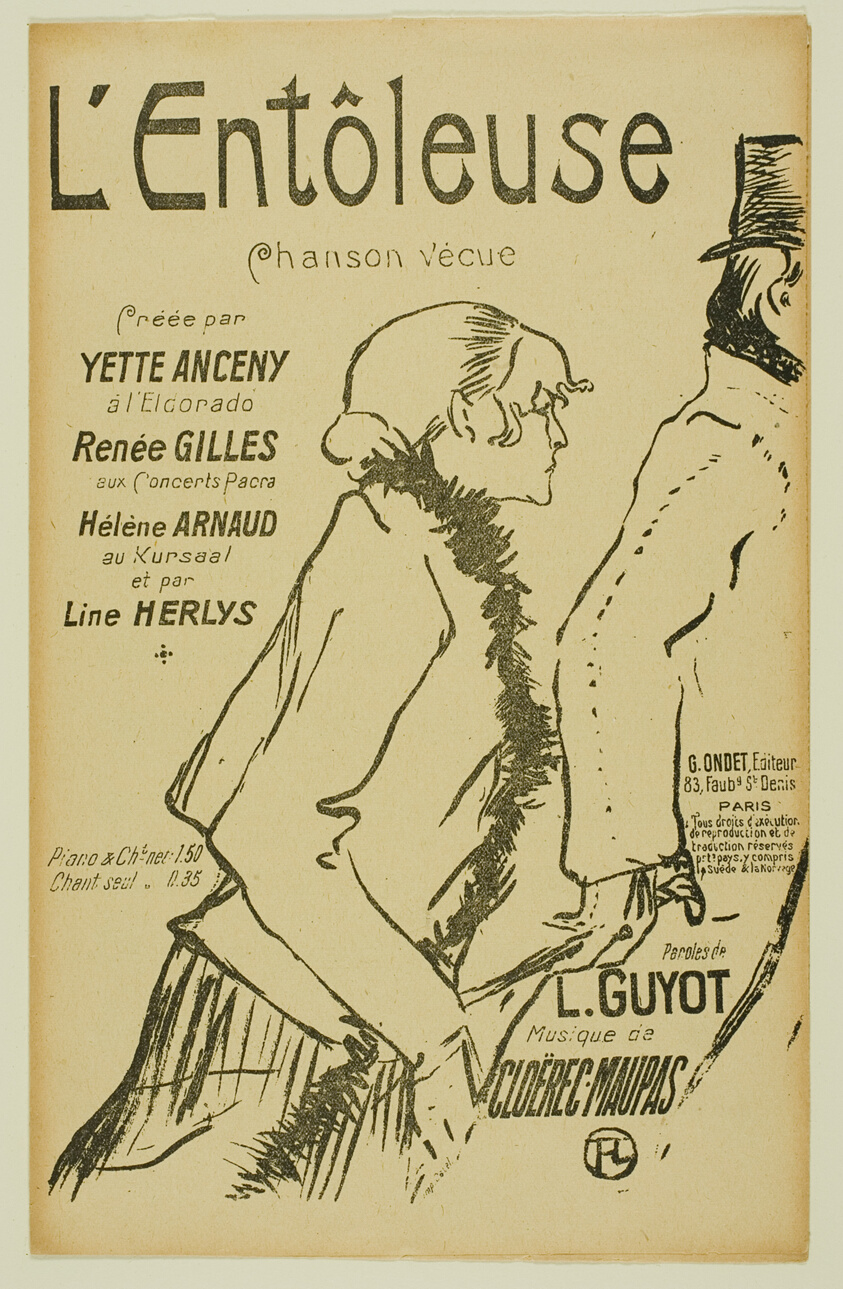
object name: Print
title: Poor Street-Walker!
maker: Henri de Toulouse-Lautrec (French, 1864-1901)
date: 1893, published 1918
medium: Lithograph on cream wove paper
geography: France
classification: lithograph; print; prints and drawing